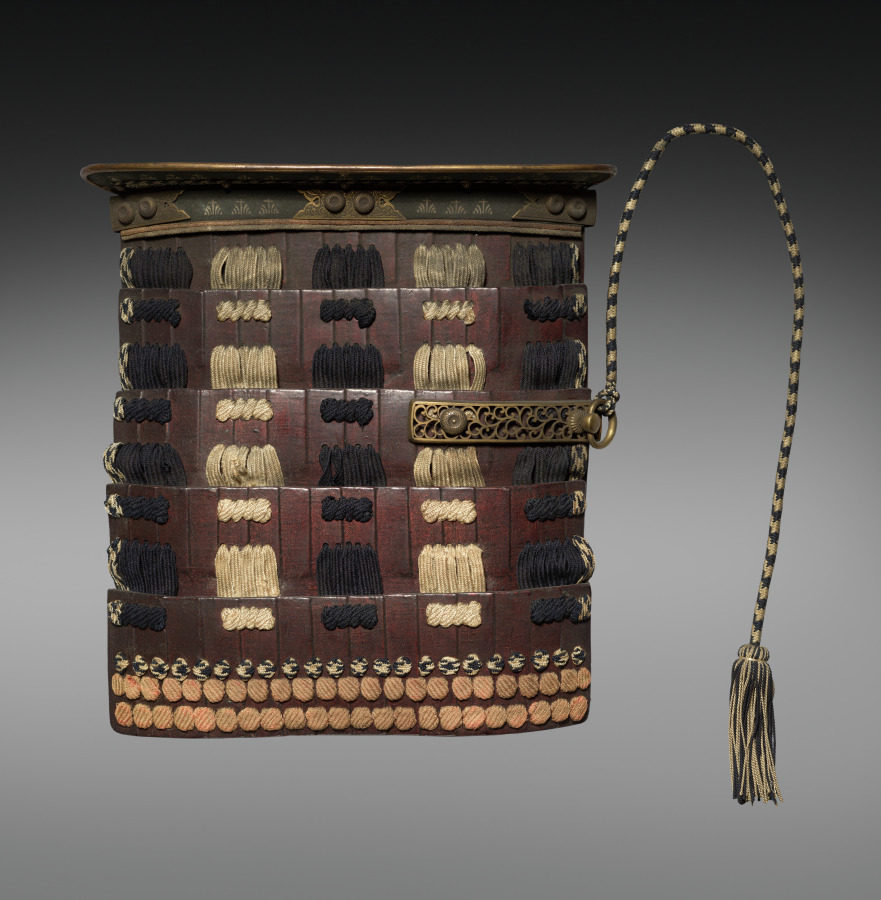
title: Shoulder Guard (Sode)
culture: Japan, Edo period (1615–1868)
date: 1600s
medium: Iron, lacquer, textile (silk)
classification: Arms and Armor